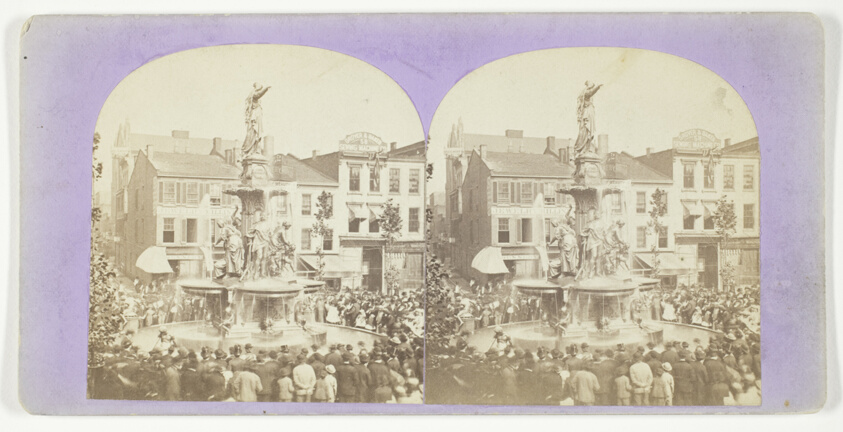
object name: Photograph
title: Untitled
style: 19th century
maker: Artist unknown; 19th century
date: 1875/99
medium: Albumen print, stereo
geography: United States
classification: photography; photograph